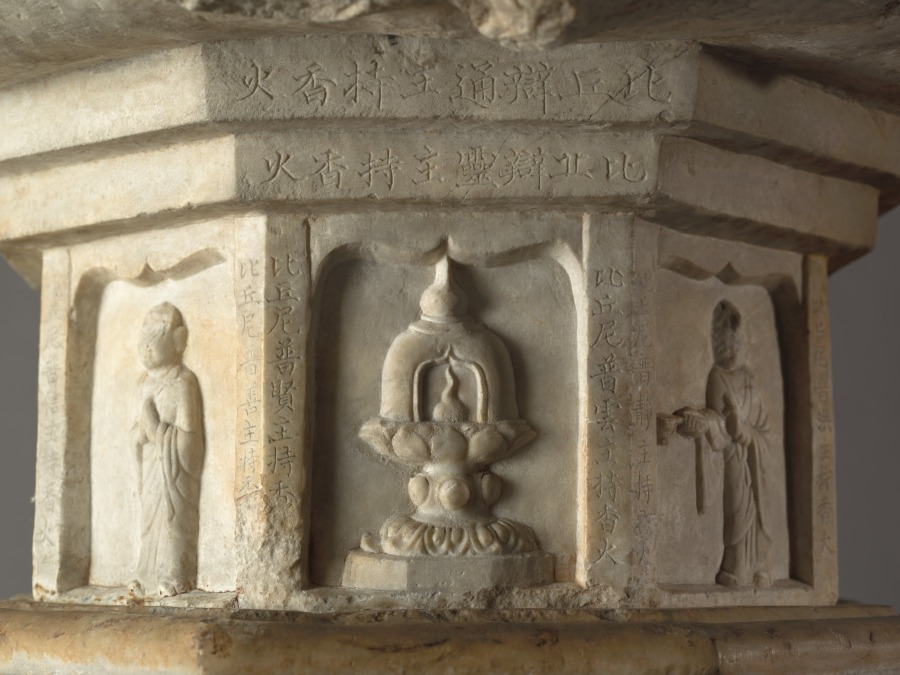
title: Fang Xuanling Pedestal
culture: China, Tang dynasty (618-907)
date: 647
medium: marble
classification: Sculpture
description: This double lotus pedestal exhibits the rich, ornate style of early Tang sculpture. It was commissioned by the Duke of Liang, Fang Xuanling (578–648), for the blessing of his second son and daughter-in-law, the Tang imperial princess of Gaoyang. The iconography and inscription suggest that it originally went with a statue, now missing, of Shakyamuni, the historical Buddha, instead of Amitayus. Today the pedestal is topped with Amitayus, the Buddha of Infinite Life, seated in meditation. Although the pedestal was not made with the statue, the combination is faithful to the original artistic conception.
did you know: In front, the top layer of the pedestal has an abstract curvilinear motif suggesting drapery; the rear is carved with a flower-and-leaf motif.